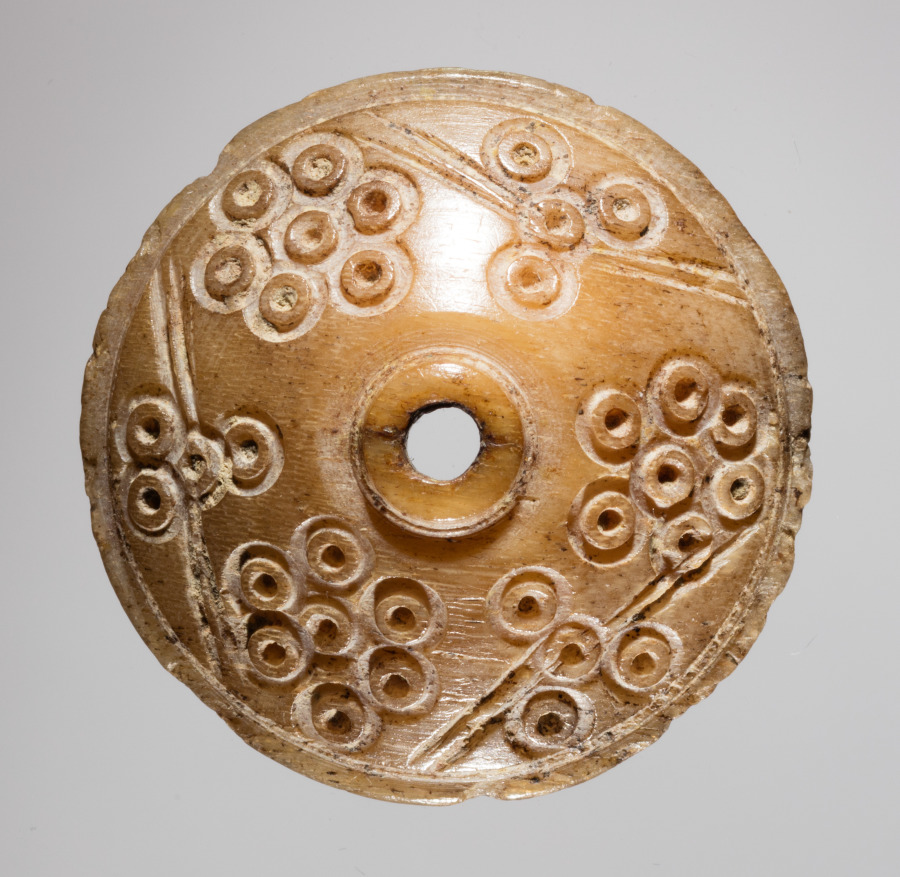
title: Spindle Whorl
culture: Iran, early Islamic period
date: 700s - 900s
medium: bone, incised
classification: Spindle Whorl